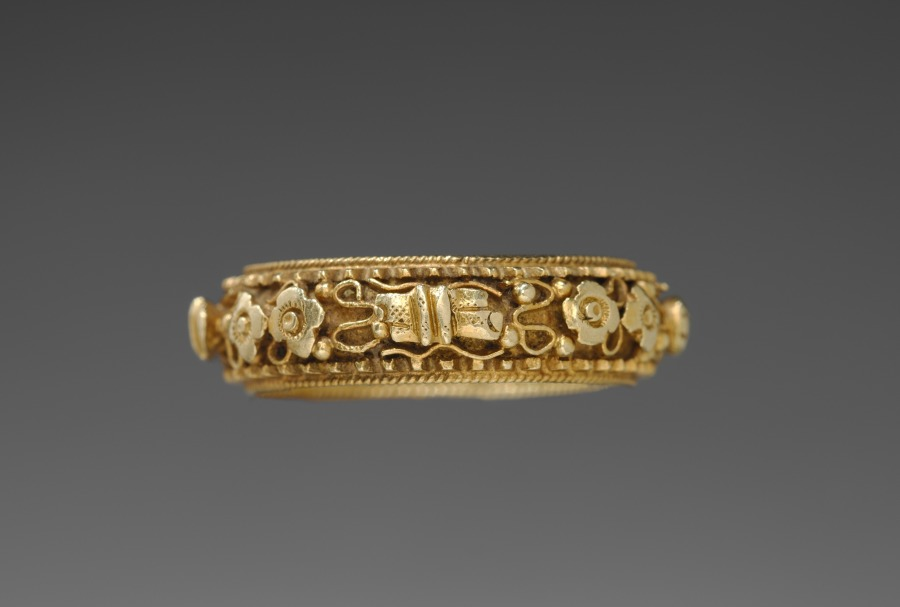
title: Ring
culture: Cambodia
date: 1800s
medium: gold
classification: Jewelry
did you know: This gold ring is encircled with flowers in relief.